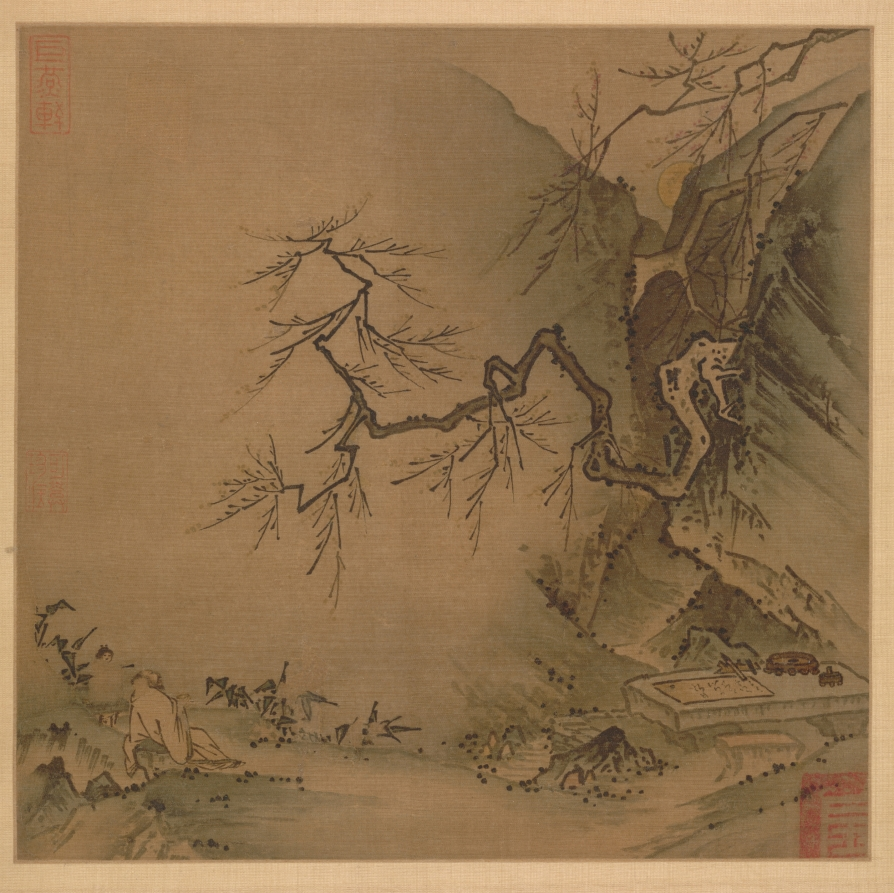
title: Drinking in the Moonlight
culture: China, Southern Song dynasty (1127-1279)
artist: Ma Yuan (Chinese, c. 1150–after 1255)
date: late 1100s–early 1200s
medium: Album leaf; ink on silk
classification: Painting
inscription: 1-1/2 seals: half-seal of Ming imperial collection (used 1372–84); 1 unidentified.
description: Once the moon rises and the wine is finished, perhaps the reclined tipsy gentleman will return to the stone table, where ink, paper, and brush can be seen. For moon enthusiasts in Hangzhou, there was a site named Yue Yan, or Moon Cliff, behind the imperial precincts on Mount Fenghuang. With its geographical features of receding craggy rocks leading to the framed full moon, there is good reason to believe that the scene depicts this specific site. The association of this painting with Ma Yuan is stylistically based. However, the brushwork accords more with the aesthetic approach of his son, Ma Lin.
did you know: The gentleman depicted is relaxing with a cup of wine in his hand.